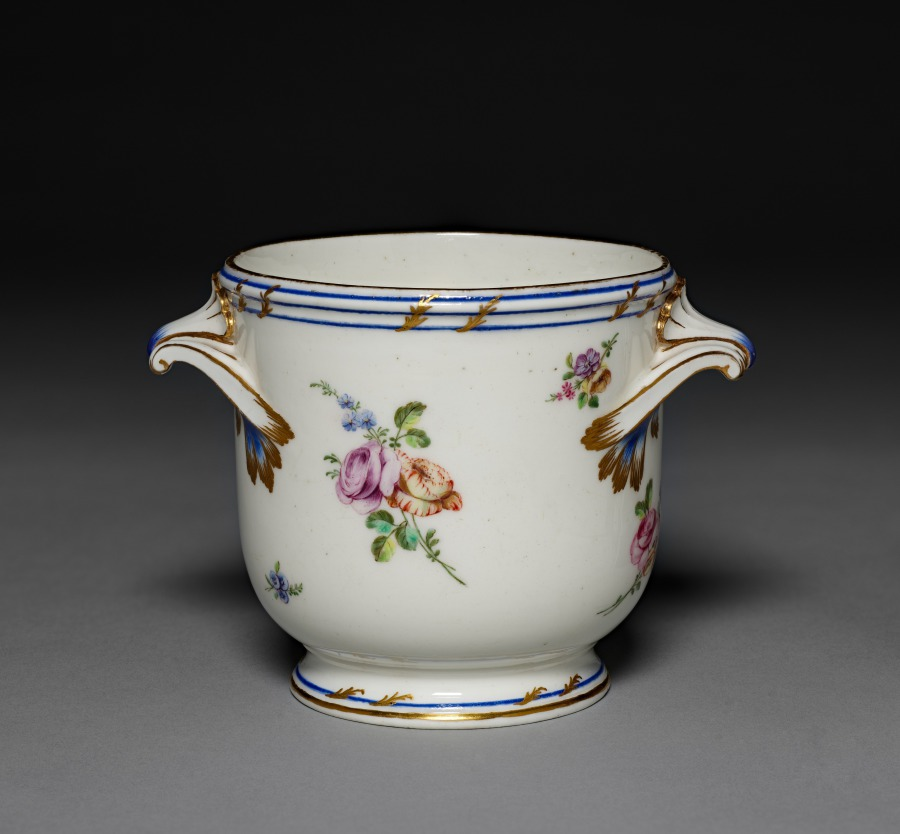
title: Glass Cooler (Seau à verre ordinaire)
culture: France, Sèvres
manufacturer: Sèvres Porcelain Factory (French, est. 1756)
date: 1759–60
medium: soft-paste porcelain with enamel and gilt decoration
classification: Ceramic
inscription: [Painter's mark, possibly for Claude-Joseph Cardin]: "g"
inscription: [Incised]: "LP"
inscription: [Incised] "2"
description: In 18th-century France, wine was traditionally drunk chilled. This object would have held crushed ice or ice water to chill small bottles or glasses. Shifts in the strict dining protocol of 18th-century France under Louis XV meant that bottle coolers would have been placed within reach of the diners, rather than their traditional placement on the side board.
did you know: A bottle cooler of this design was first purchased in 1752 by Madame de Pompadour, great patron of the Sèvres porcelain factory and official mistress of French King Louis XV.